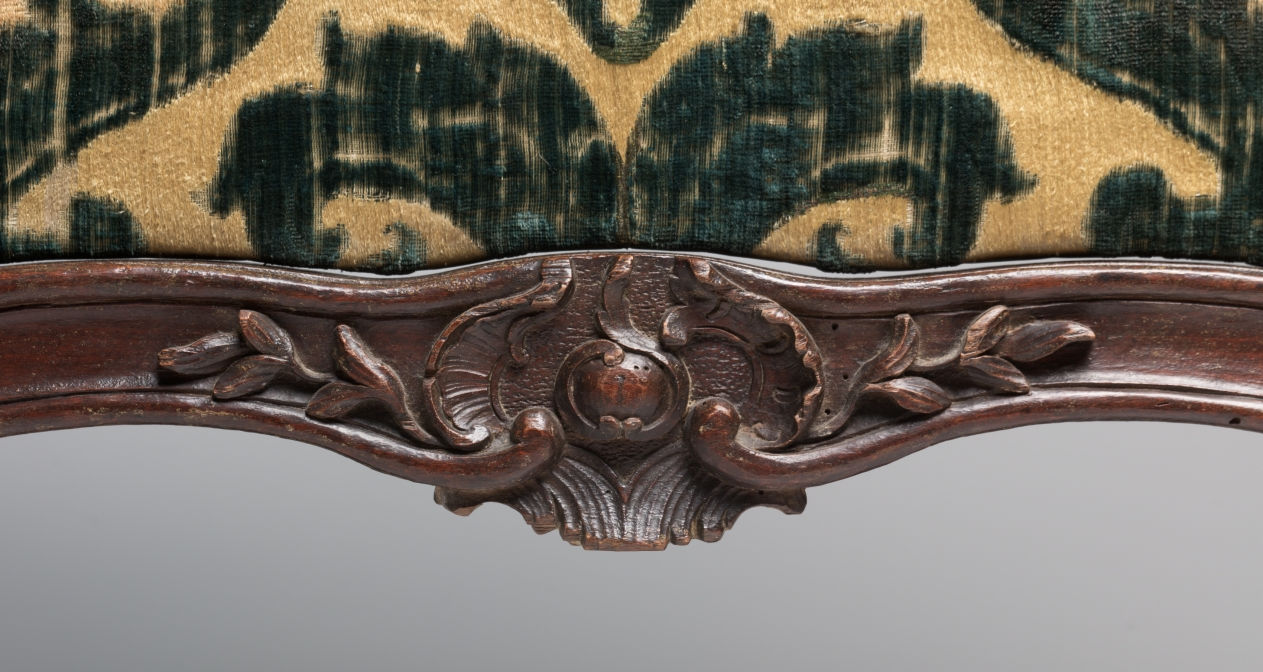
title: Fire Screen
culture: France, 18th century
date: c. 1750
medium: wood and velvet panel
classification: Furniture and woodwork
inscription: inscribed beneath in three places: 32.